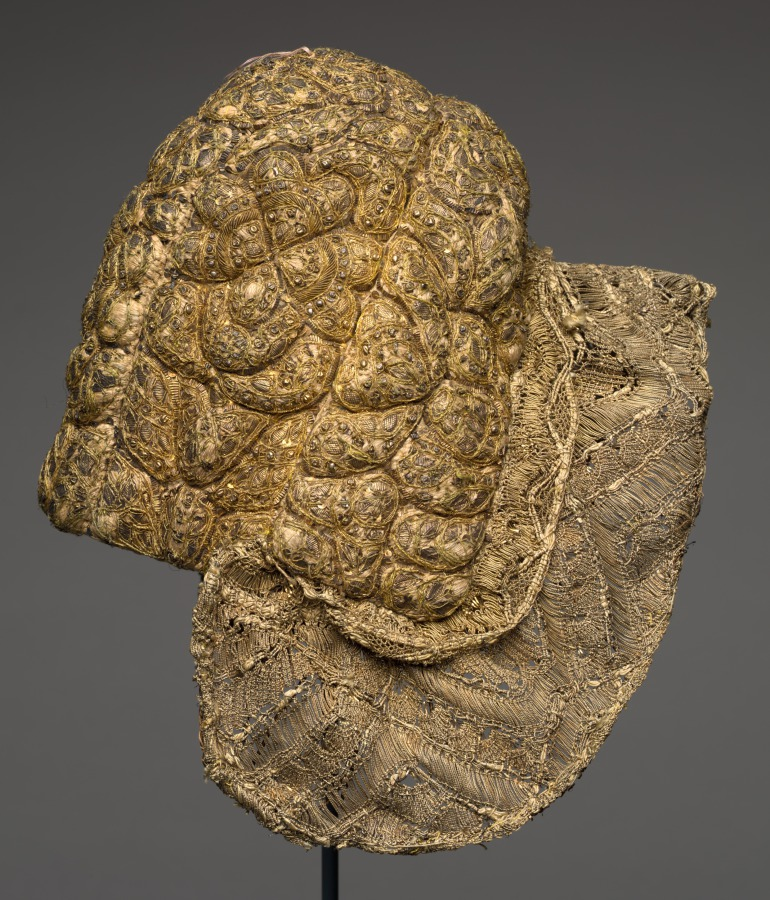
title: Embroidered Peasant Headdress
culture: Germany, Nüremberg, 18th century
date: 1700s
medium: embroidery, gold thread; edged with gold lace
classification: Garment